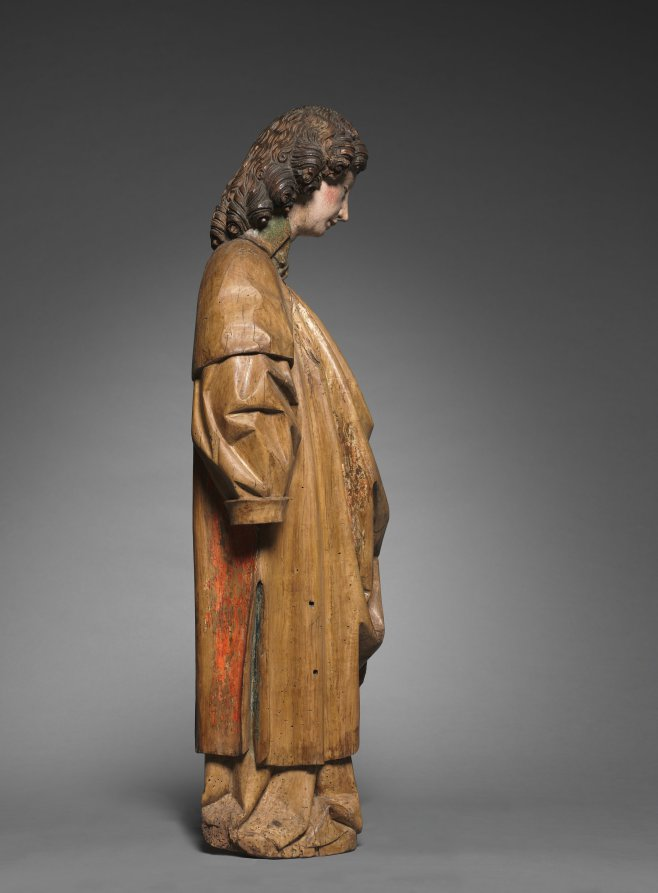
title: Saint Lawrence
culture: Austria, South Tyrol, late 15th century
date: c. 1490–1500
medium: lindenwood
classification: Sculpture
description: Lawrence of Rome (about 225–258 CE) was one of the seven deacons of ancient Rome martyred in 258 CE, and became one of the most widely venerated saints during the Middle Ages. According to tradition, he met his martyrdom by being roasted on a gridiron, an attribute which he either holds or stands upon in art. (See a depiction of him by Tilman Riemenschneider nearby in this gallery.) Lawrence is always portrayed as a young man wearing the deacon’s dalmatic. The original source and context of this sculpture is not known. Since it is not carved in the round, it was likely placed within the niche of a large altarpiece.